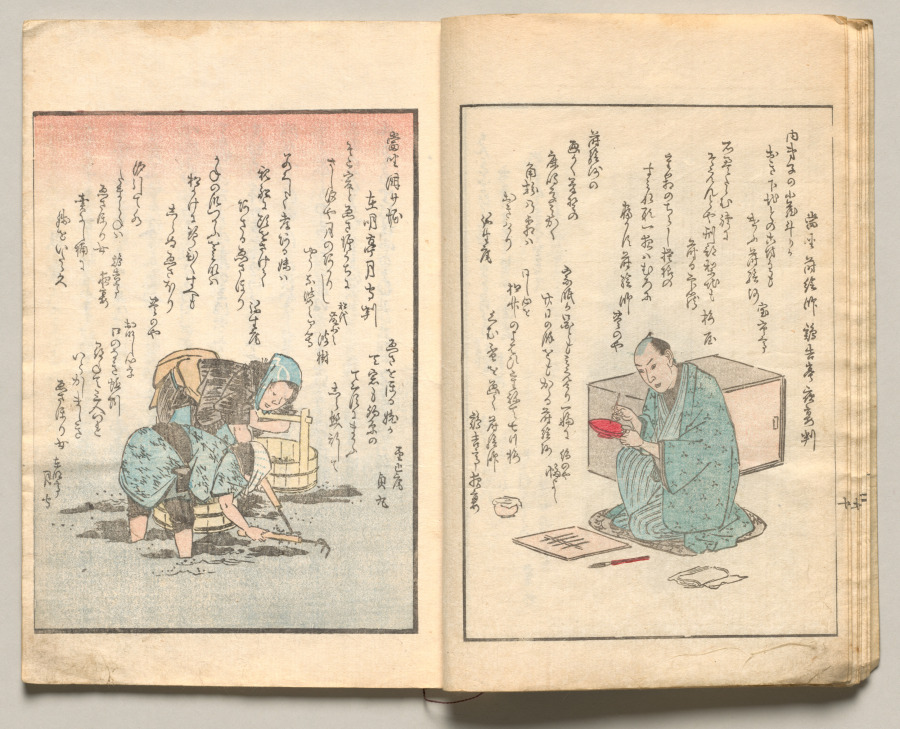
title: Spread Eight from Volume Five of People of Japan in Light Verse (Kyōka)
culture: Japan, Edo period (1615–1868)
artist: Utagawa Hiroshige (Japanese, 1797–1858)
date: 1857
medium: Woodblock-printed book; ink and color on paper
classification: Bound Volume